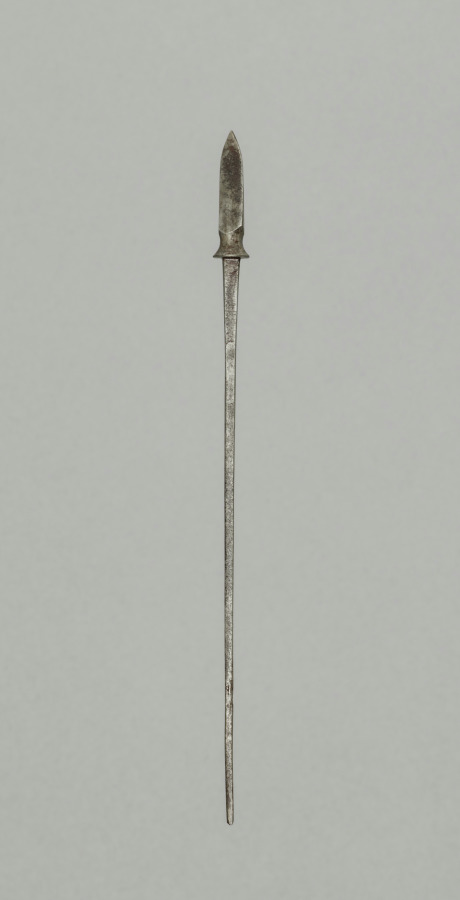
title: Arrow Point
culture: Japan, Edo period (1615–1868)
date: 1700s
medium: steel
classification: Arms and Armor